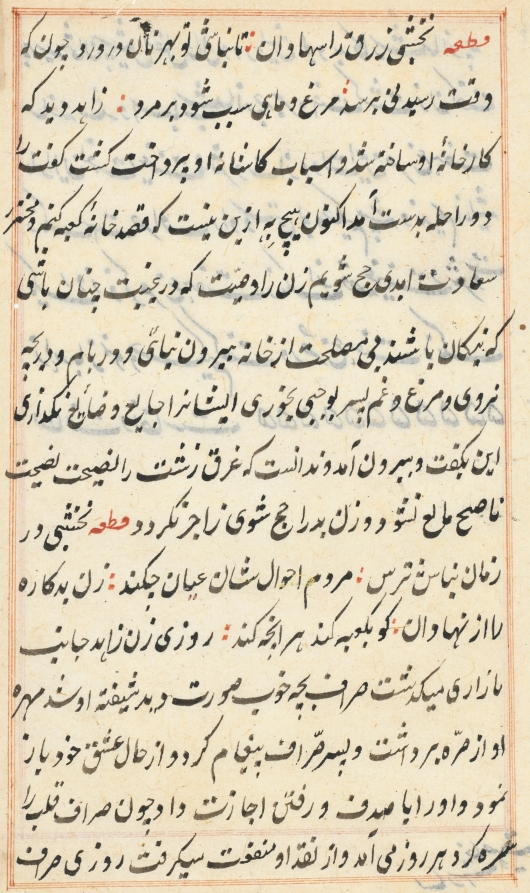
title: Page from Tales of a Parrot (Tuti-nama): text page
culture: Mughal India, court of Akbar (reigned 1556–1605)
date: c. 1560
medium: gum tempera, ink, and gold on paper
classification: Painting